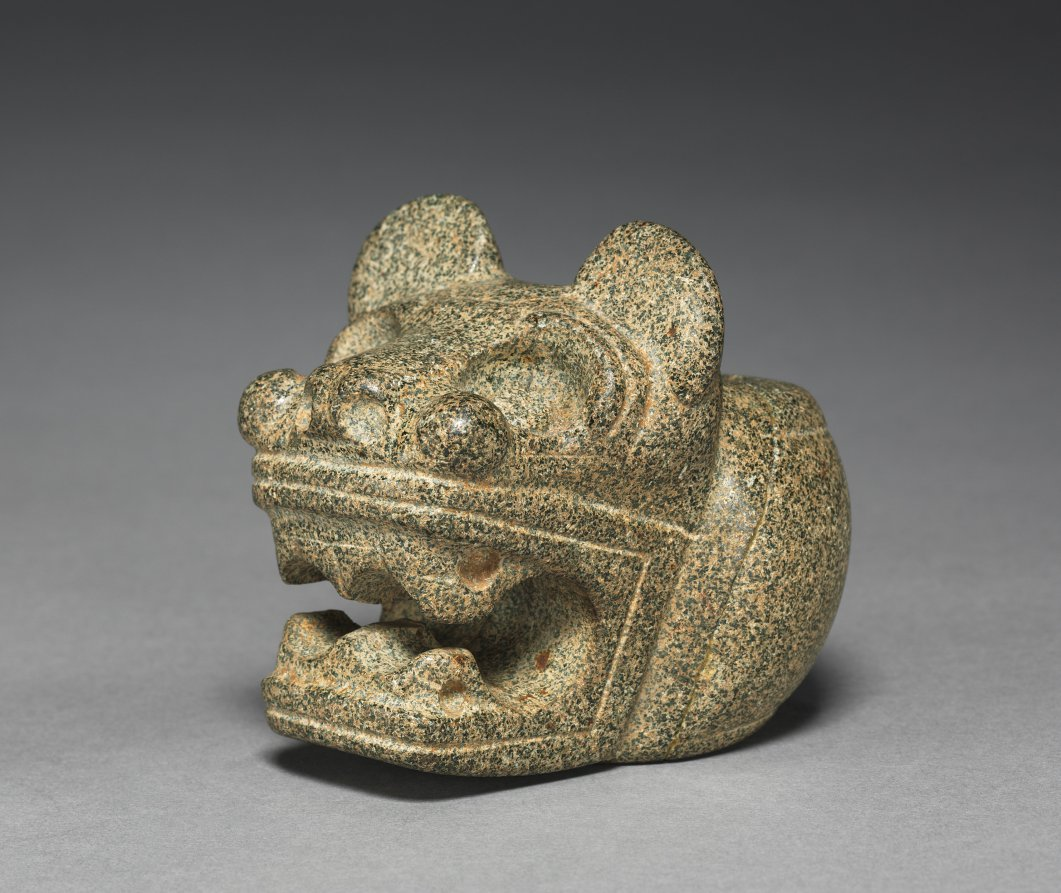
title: Ceremonial Mace (Club) Head: Feline (Jaguar?)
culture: Costa Rica, Southern Nicoya region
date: c. 300 BCE–600 CE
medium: stone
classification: Stone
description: Probably once mounted on wooden shafts, these objects could have served as symbols of chiefly authority, group insignia, the heads of ceremonial weapons, or all three. They eventually were placed in elite graves. The bird may be a male curassow and the feline, a jaguar.